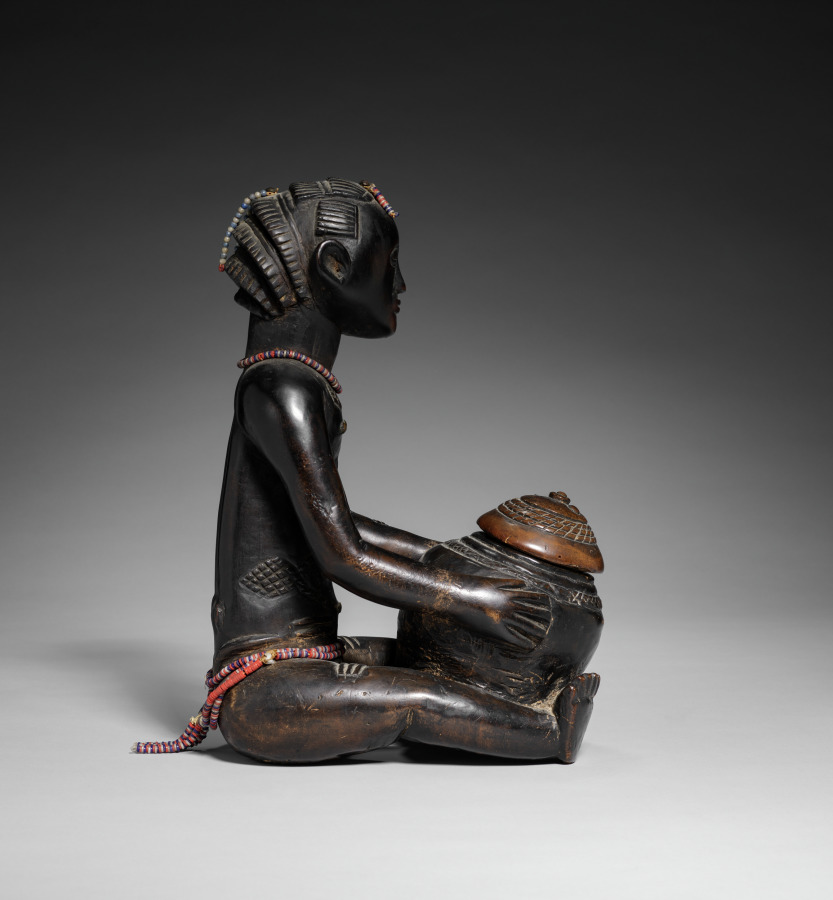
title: Female Bowl-Bearing Figure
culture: Africa, Central Africa, Democratic Republic of Congo, Luba-style carver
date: late 1800s-early 1900s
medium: Wood, glass beads, upholstery studs, plant fiber, and iron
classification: Sculpture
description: In Luba-style art, an object's beauty affects how well it works. While bowl-bearing figures had many possible uses, a royal diviner likely used this well-carved image of a woman carrying a bowl in rituals. Dusty traces of mpemba (white chalk) fleck the shining exterior and the bowl's interior, showing it once held this sacred powder. Diamond-shaped scarification marks at her waist, chest, and back add to her beauty. Her hair is carved into the cascading layered hairstyle worn in the Luba region at the turn of the twentieth century. Strands of imported glass beads encircle her waist and neck, and dangle from her hair. The alternating white and blue beads may symbolize the moon and Mbidi Kiluwe, a culture hero linked to royal practice and smithing. While much Luba-style art depicts women—who are societally important—men created and owned the majority of such works.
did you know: Symbolic of anvils, the round metal tacks decorating the figure's hair "pin" spirits and their secrets within it. They are at the hairline and each of the four hair cascades (the bottommost is now gone).